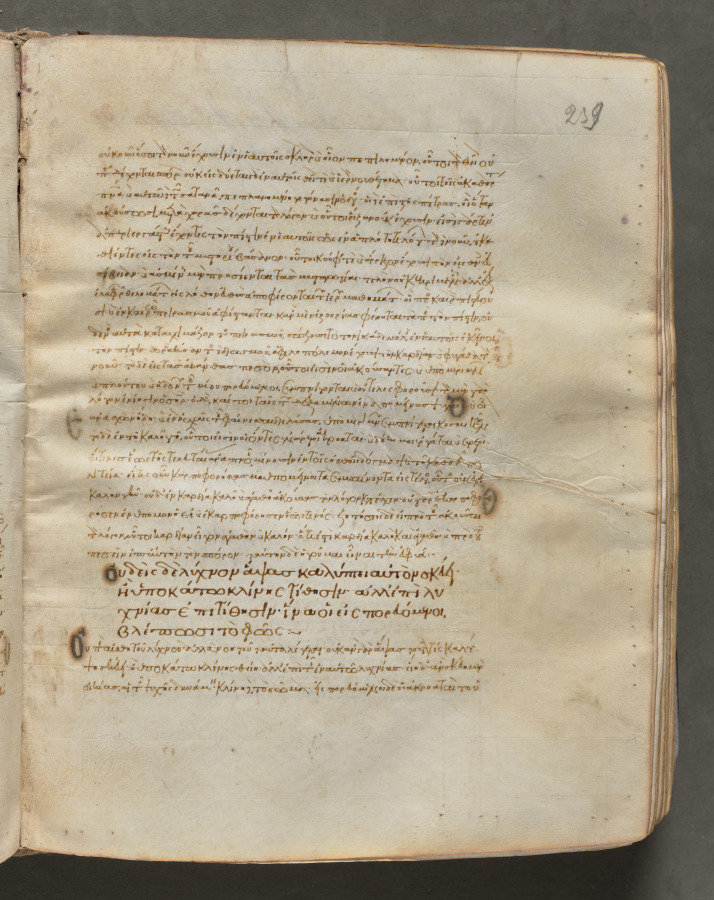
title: Text, folio 239 (recto), from a Gospel Book with Commentaries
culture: Byzantium, Constantinople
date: c. 1000–1100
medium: ink, tempera, and gold on vellum; leather binding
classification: Bound Volume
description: Each of the four gospels in this book opens on a page with brilliantly illuminated borders depicting the author of the text as well as birds—principally peacocks, symbols of the immortality of the soul—and fountains, representing the fountain of life and the salvation of the soul. This volume consists of 428 leaves with texts in Greek. Its level of sophistication suggests that it was probably written and decorated in a monastery in Constantinople.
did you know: Gospel books were carried in procession through Byzantine churches.